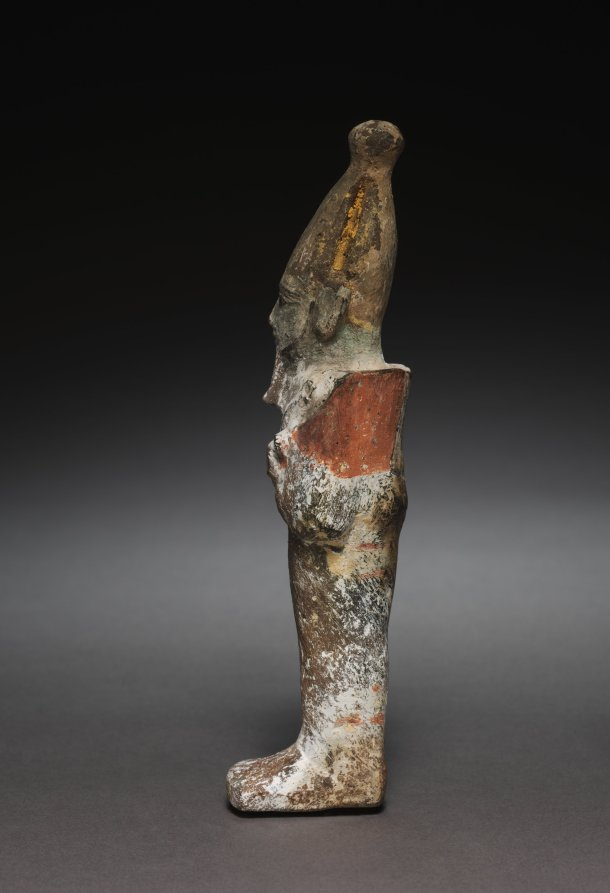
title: Statuette of Osiris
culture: Egypt, New Kingdom (1540–1069 BCE), Dynasties 19–20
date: 1295–1069 BCE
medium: painted terracotta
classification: Funerary Equipment